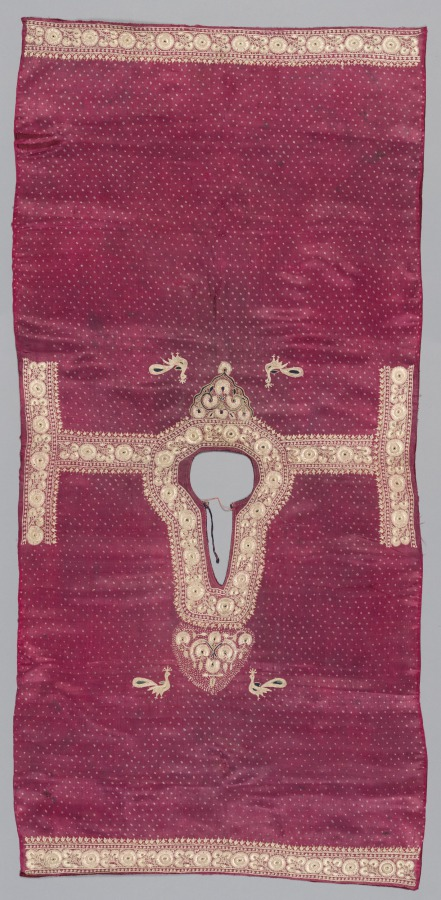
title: Shirt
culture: Western India, Gujarat, Kachchh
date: early 1900s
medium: silk thread on silk ground, embroidery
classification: Embroidery